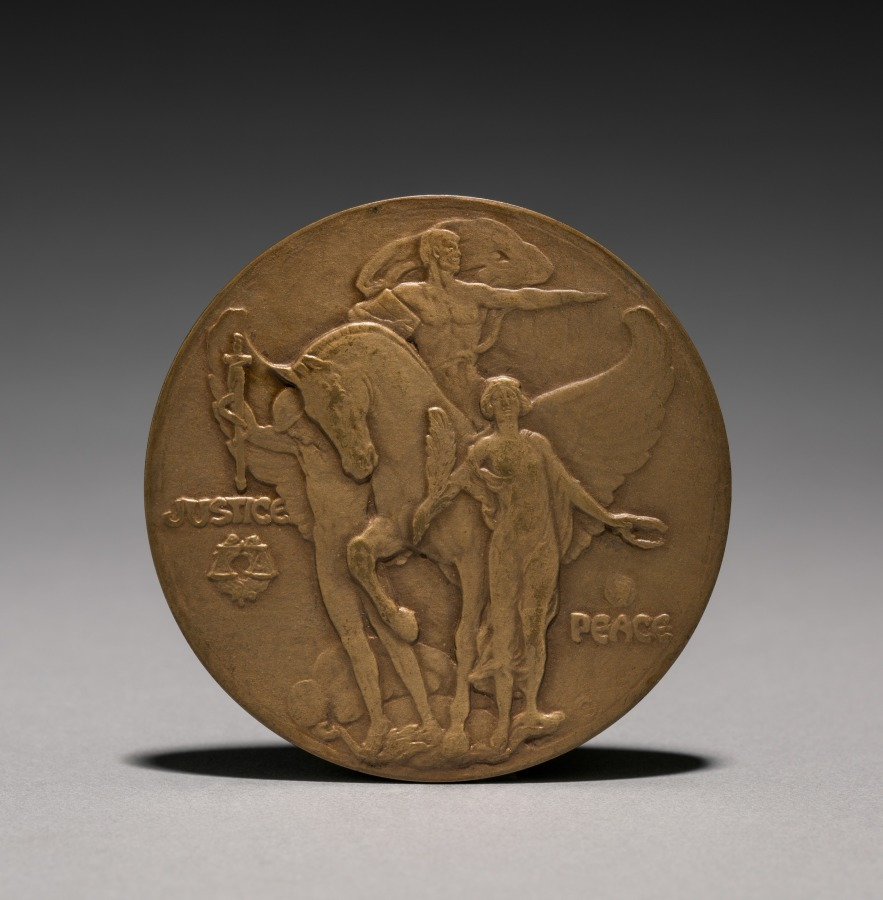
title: Medal to Commemorate the Treaty of Versailles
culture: America, early 20th century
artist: Chester Beach (American, 1881–1956)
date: 1919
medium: bronze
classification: Metalwork